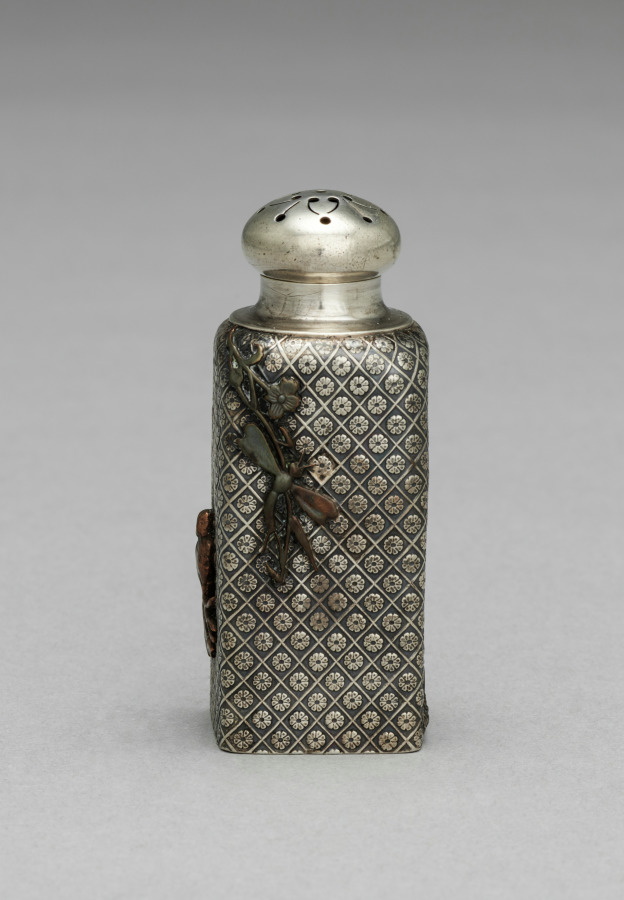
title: Pepper Shaker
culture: America, Rhode Island, Providence, 19th century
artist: Gorham Manufacturing Company (America, est. 1831)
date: c.1875–1885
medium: silver and mixed metals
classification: Silver